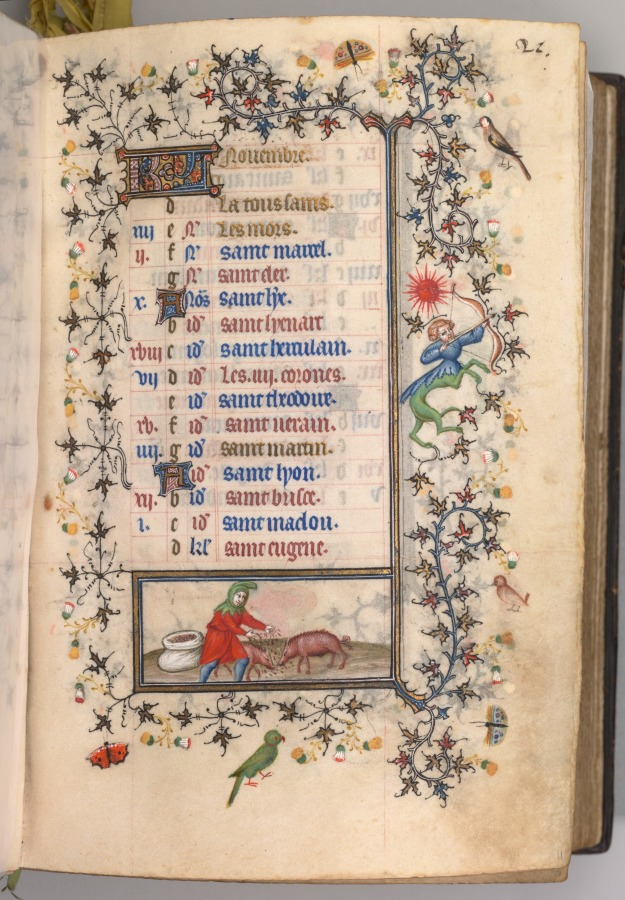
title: Hours of Charles the Noble, King of Navarre (1361-1425): fol. 11r, November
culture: France, Paris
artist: Master of the Brussels Initials and Associates (French)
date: c. 1405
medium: ink, tempera, and gold on vellum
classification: Bound Volume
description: This precious volume was obviously highly prized by its owner, the French-born King of Navarre, who had his coat of arms painted on no less than twenty folios. Rather than directly commissioning this manuscript from a specific workshop, it seems that Charles the Noble acquired his book of hours -- perhaps ready-made for the luxury market -- while on a trip to Paris in 1404-05. A collaborative effort, six painting styles are evidenced within the pages of this codex, those of two Italians, two Frenchmen, and two Netherlanders. The painter who was responsible for the planning and decoration of the book, and who produced seventeen of the large miniatures, was a Bolognese artist known as the Master of the Brussels Initials. His principal assistant, responsible for most of the borders, was a Florentine who signed his name "Zecho" da Firenze on folio 208 verso.